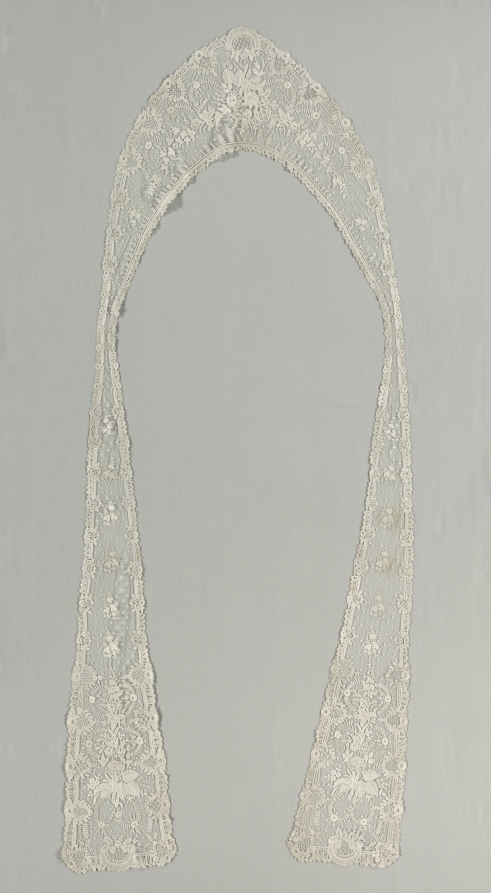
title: Fichu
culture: France or Belgium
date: c. 1875–80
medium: Composite lace. Machine-made netting (reseau), Brussels bobbin lace and French needle point lace; linen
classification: Lace